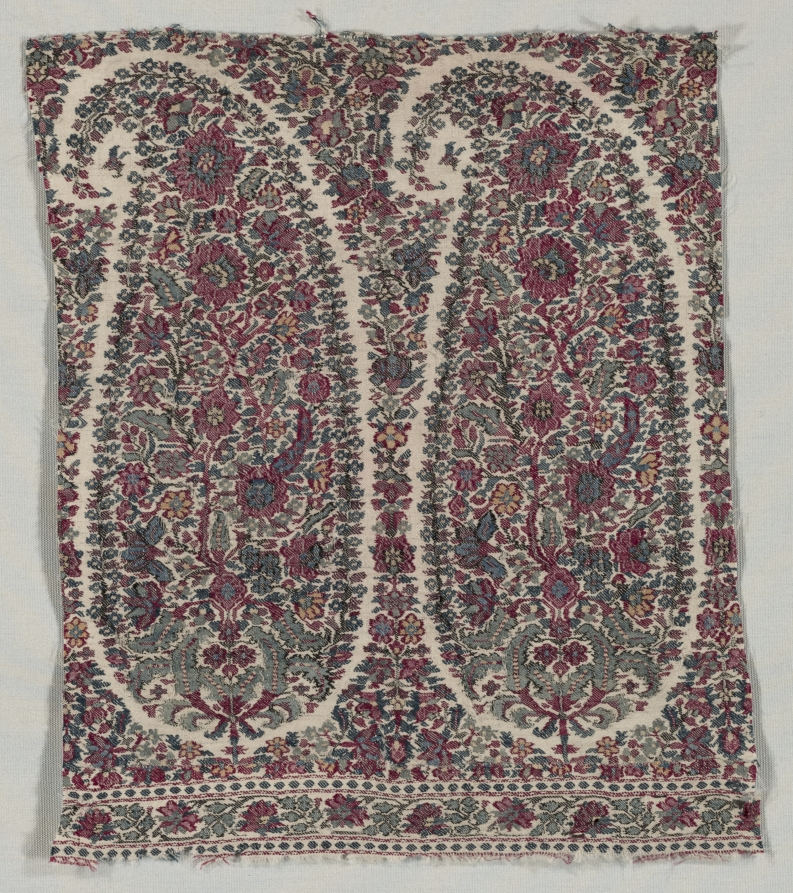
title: Long Shawl Fragment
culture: India, Kashmir, 19th century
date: 1820–1825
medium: 2/2 twill tapestry weave, double interlocked; wool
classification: Textile